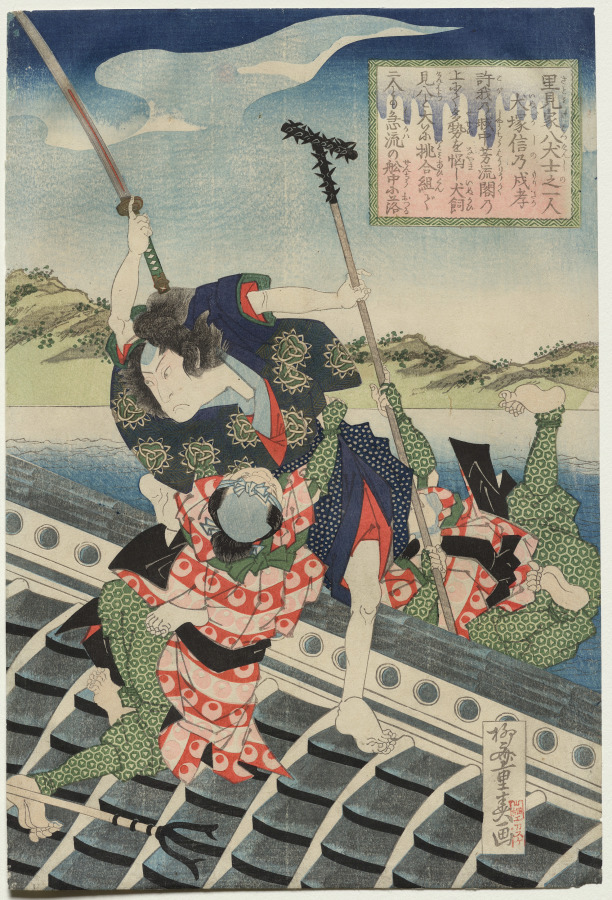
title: Arashi Rikan II as Inuzuka Shino Moritaka and Nakamura Utaemon III as Inukai Kenpachi Michinobu Battling (from the series The Eight Heroes of the Satomi Clan)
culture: Japan, Edo period (1615–1868)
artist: Ryūsai Shigeharu (Japanese)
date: 1834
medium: color woodblock print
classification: Print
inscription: Signature: Ryusai Shigeharu ga Engraver: Yama saiku Kasuke